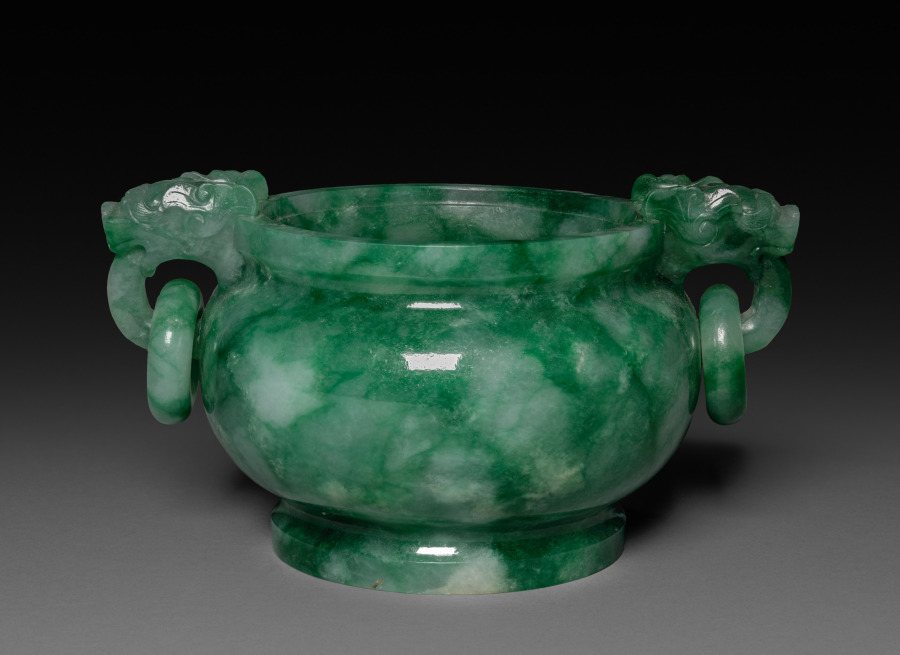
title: Incense Burner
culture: China, Qing dynasty (1644–1911), Qianlong reign (1736–95)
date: 1736–95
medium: green jade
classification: Jade